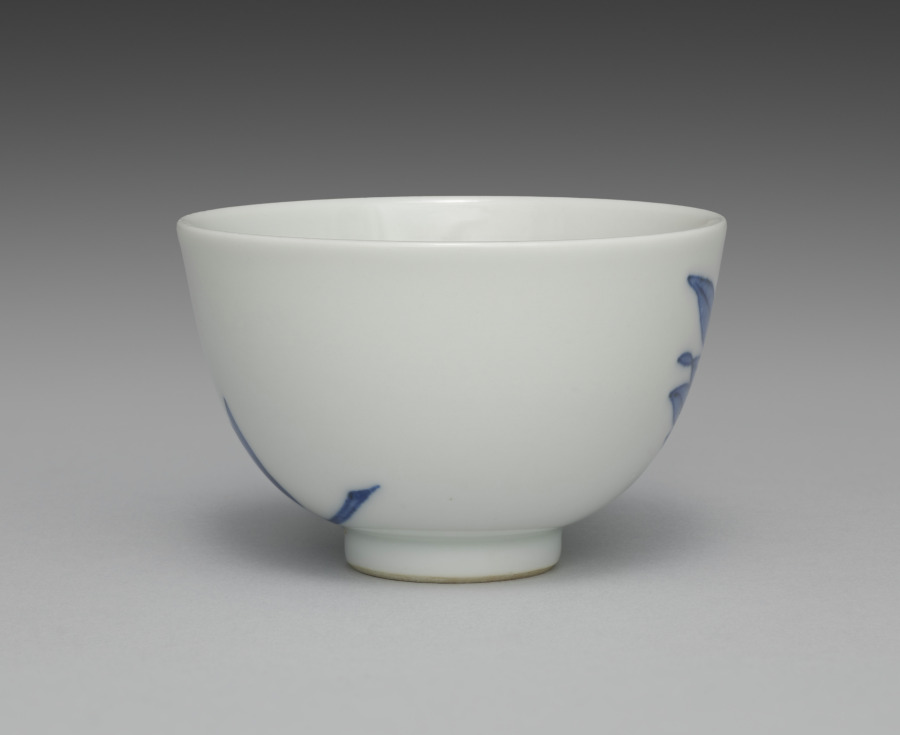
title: Teacup from Tea Set with Orchids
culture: Japan, Meiji period (1868–1912)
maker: Seifū Yohei III (Japanese, 1851–1914)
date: c. 1893–1914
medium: Porcelain with underglaze blue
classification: Ceramic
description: Although the teapot here is stored in a separate box from the five cups, these six pieces may once have been part of a tea set that included other tools such as a water cooler. The teacups have orchid flowers on both sides in underglaze blue, as well as a blue band inside the footring. The teapot has the same design and a blue band painted around the bottom of the lid’s knob. The cups’ long wood storage box is stamped on the exterior, over the lid and base, with a small red seal reading “Satō.” The same seal appears on five small squares of yellow textile, one placed in the bottom of each compartment in the teacup storage box. These are additional to the customary yellow cloths stamped with a “Seifu” seal. Interestingly, four of the Seifū cloths are stamped with an ovoid seal, while the remaining cloth, which is a slightly lighter color, has an unusual seal that is not quite gourd-shaped and with the fū of Seifū in a stylized, unrecognizable form. The teapot has its own box with a Satō seal and is wrapped with an orange textile stamped with the same unusual Seifū seal. A set with a very similar surface design is in the Brooklyn Museum. The Brooklyn set has a water cooler and a small pitcher, in addition to the teapot and cups, and all are in a single storage box. This box records the tea tools as made with kanpakuji, or “bright-jewel white porcelain,” counted among Yohei III’s most important inventions, and carved images. In fact, both sets have a white surface much closer in coloration to the cool white of porcelain clay used in Kyoto at the time, and the designs are simply painted. The Brooklyn set was thus likely mismatched at some point with a box intended for another tea set. Nonetheless, the box may have helped prevent the set’s original components from being dispersed, and the set itself provides insight into how the other tools from the present set may have looked.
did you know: This tea set with orchids has a side-handled pot called a kyūsu, used for steeping, straining, and serving tea.